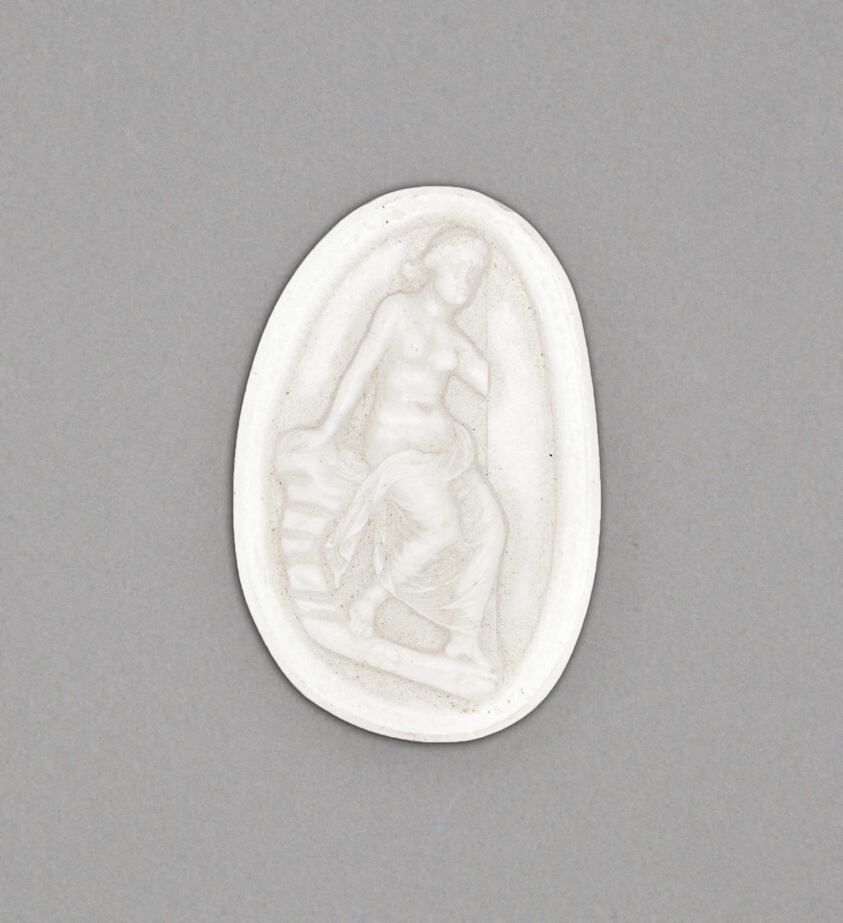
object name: Ceramics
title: Cameo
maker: Wedgwood Manufactory (England, founded 1759)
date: Late 18th century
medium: Stoneware (jasperware)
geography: Burslem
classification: cameo (sculpture); sculpture; stoneware; european decorative arts; ceramics